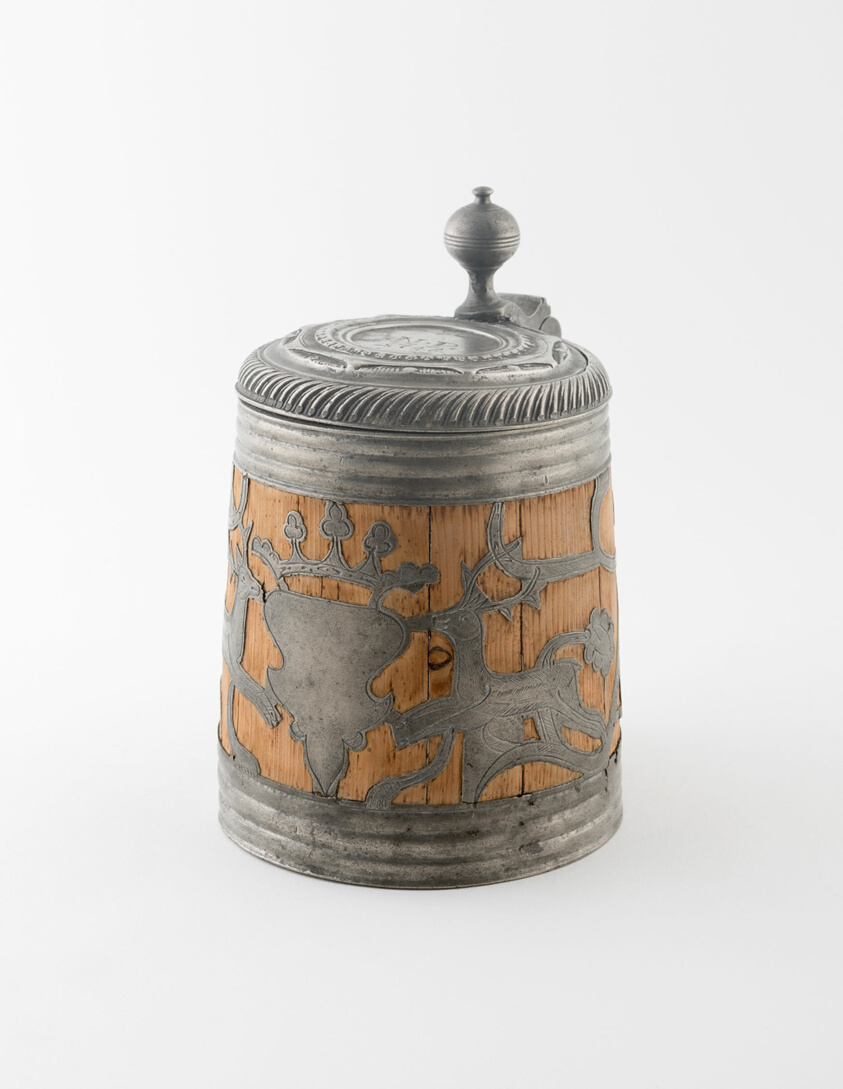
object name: Metalwork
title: Stave Tankard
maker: Germany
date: 1746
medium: Pewter and wood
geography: Germany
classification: drinking vessel; pewter; metalwork; european decorative arts